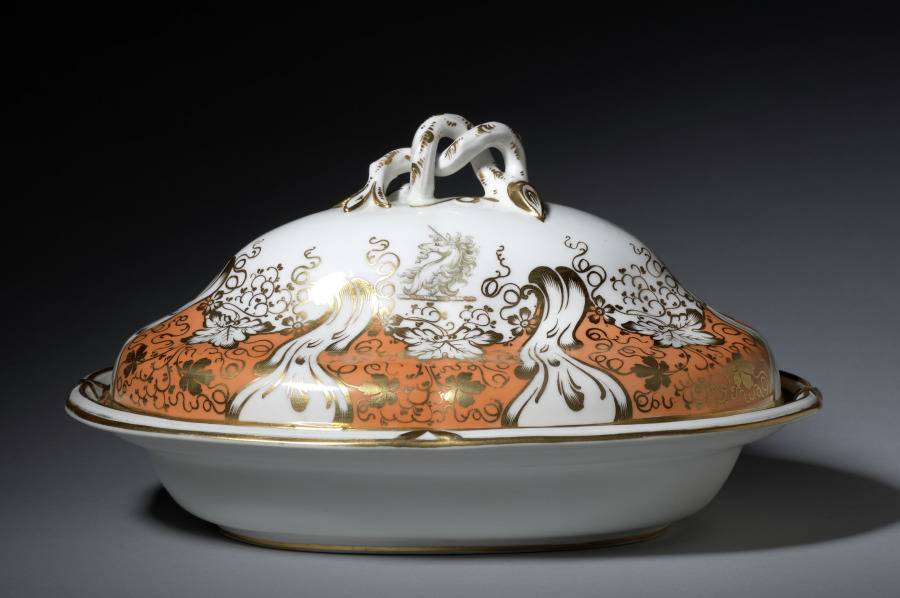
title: Vegetable Dish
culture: England, Staffordshire, early 19th century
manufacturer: Davenport Pottery and Porcelain Factory (British)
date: early 1800s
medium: ceramic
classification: Ceramic